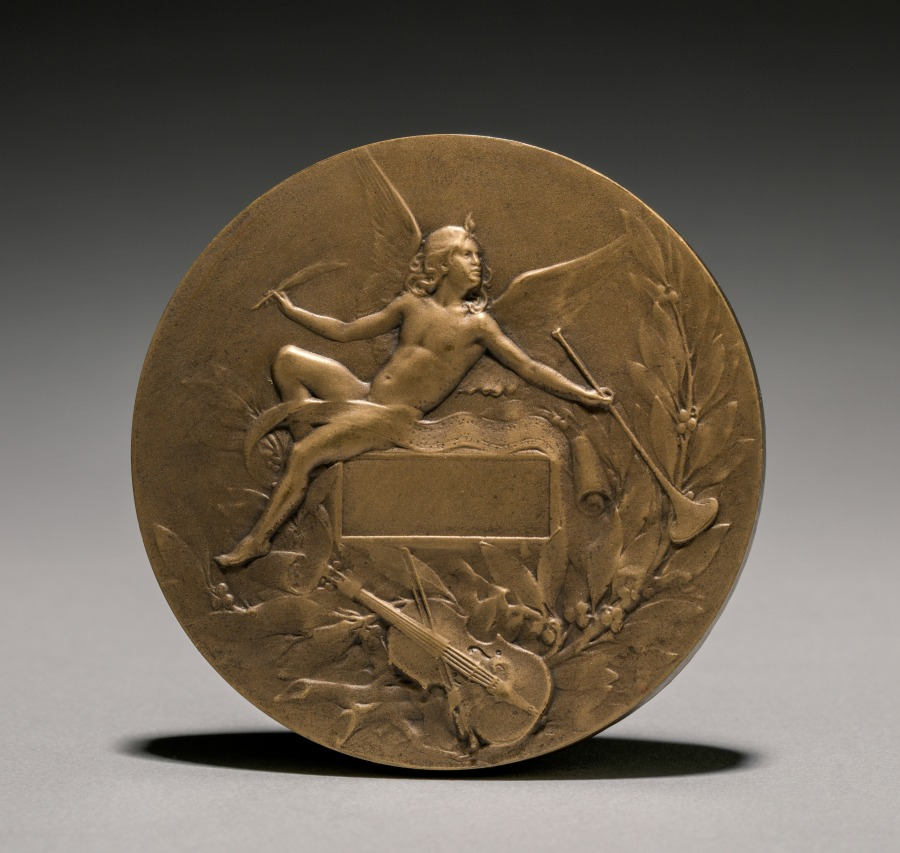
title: Medal (reverse)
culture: France, 20th century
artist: Marie Alexandre Lucien Coudray (French, 1864–1932)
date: 1900s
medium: bronze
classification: Metalwork